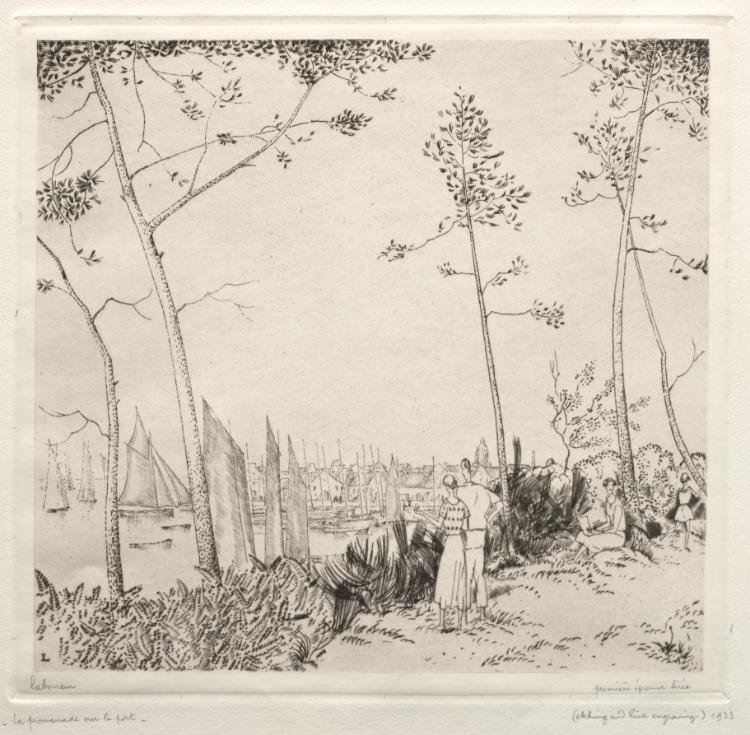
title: La Promenade sur le Port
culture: France, 20th century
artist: Jean-Émile Laboureur (French, 1877–1943)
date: 1935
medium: etching and line engraving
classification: Print